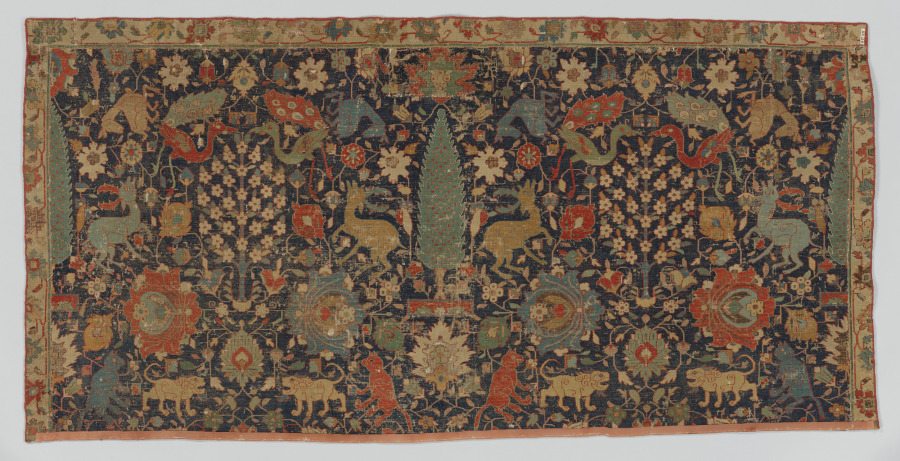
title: Portion of a Carpet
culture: Iran, Northwestern, 17th century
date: 1600s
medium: knotted pile: jufti knot; wool and cotton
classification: Carpet